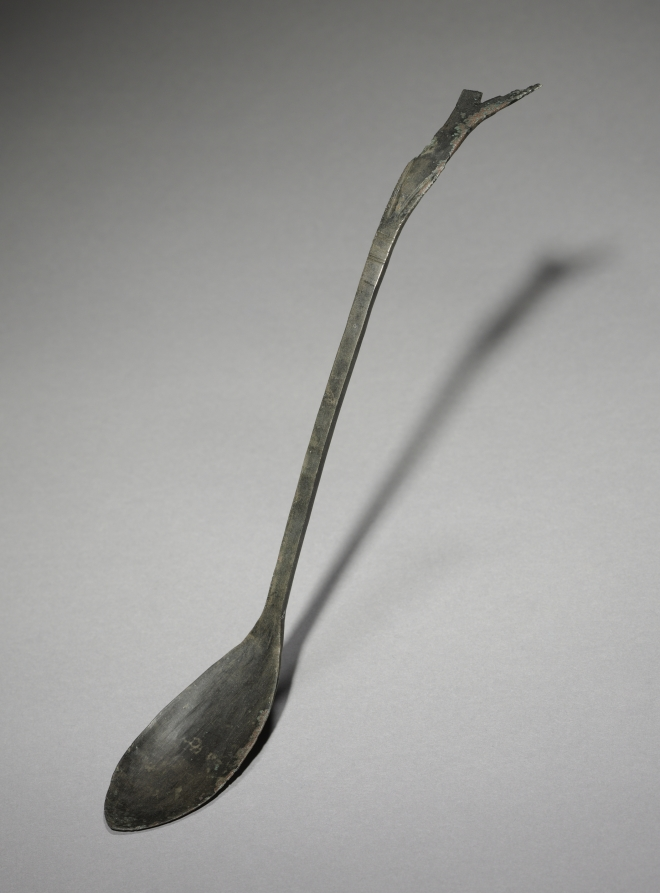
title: Spoon with Fish-Tail Design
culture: Korea, Goryeo dynasty (918–1392)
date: 918–1392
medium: bronze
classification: Metalwork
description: Many of Goryeo period spoons like this one feature a curved handle that splits into a jagged fishtail design. This fishtail design is not unique to Korea; it was also widely used in the area under the rule of two non-Han Chinese states: Liao (907–1125) and Jin (1115–1234). These seemingly ordinary objects testify to exciting material interactions between the Goryeo dynasty and non-Han Chinese northern states, which were often omitted from the official records.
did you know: Bronze spoons are the most common burial item. Scholars have proposed that toward the end of the 1300s, Koreans enjoyed meat-based soups more than any other dishes, explaining why spoons became common household items as well as burial goods.